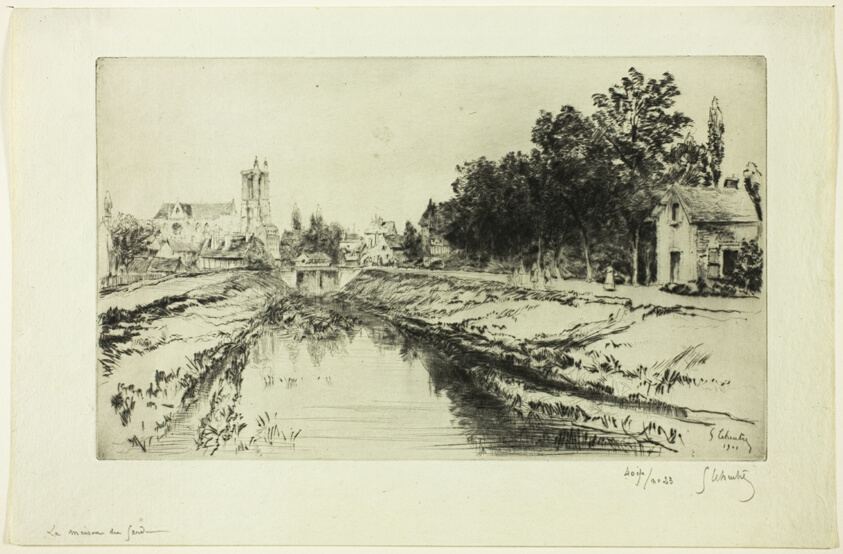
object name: Print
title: Guardhouse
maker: Gustave Leheutre (French, 1861-1932)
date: 1901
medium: Drypoint on light green laid paper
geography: France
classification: drypoint; print; prints and drawing